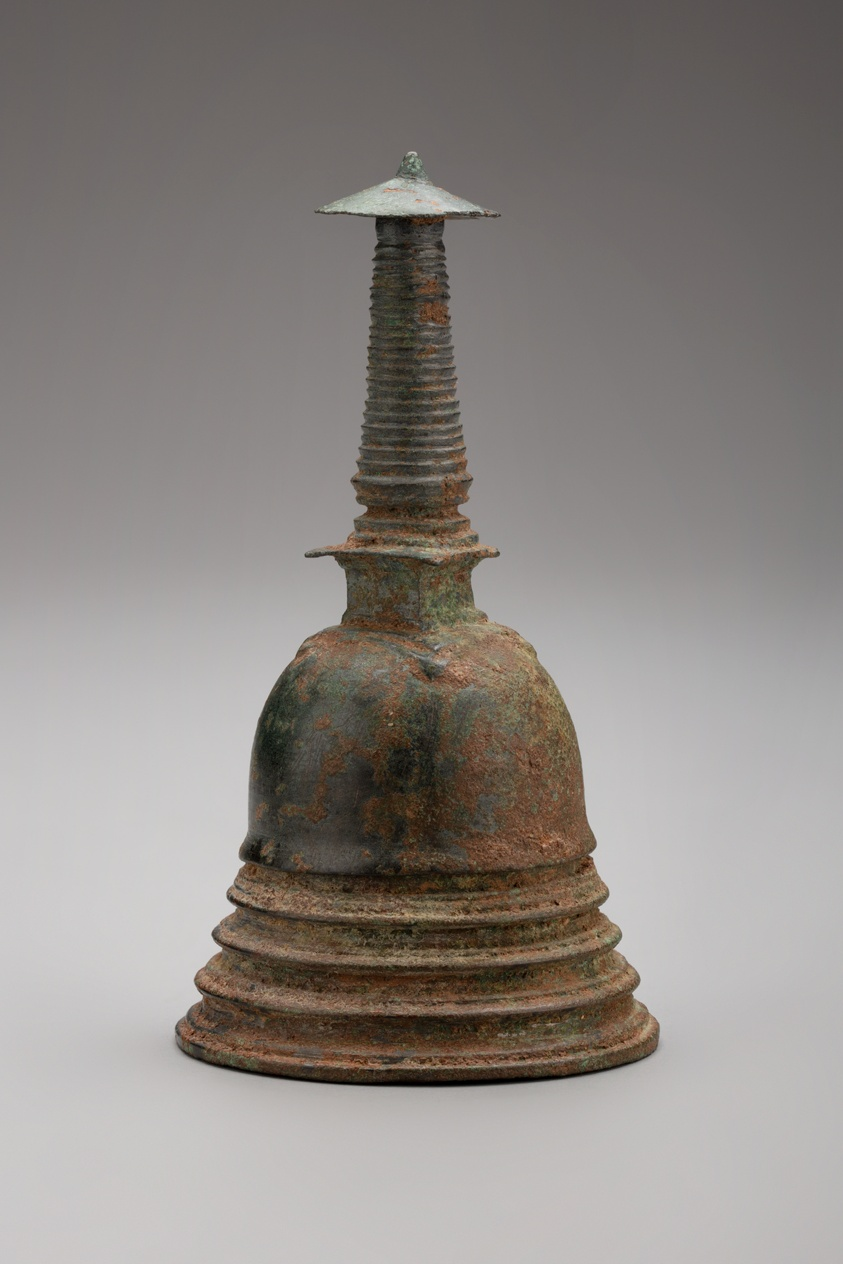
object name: Religious/Ritual Object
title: Stupa Reliquary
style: South Asian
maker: Sri Lanka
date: Polonnaruva period, 12th century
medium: Bronze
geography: Sri Lanka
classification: reliquary; container; bronze; metal; asian art; ritual objects